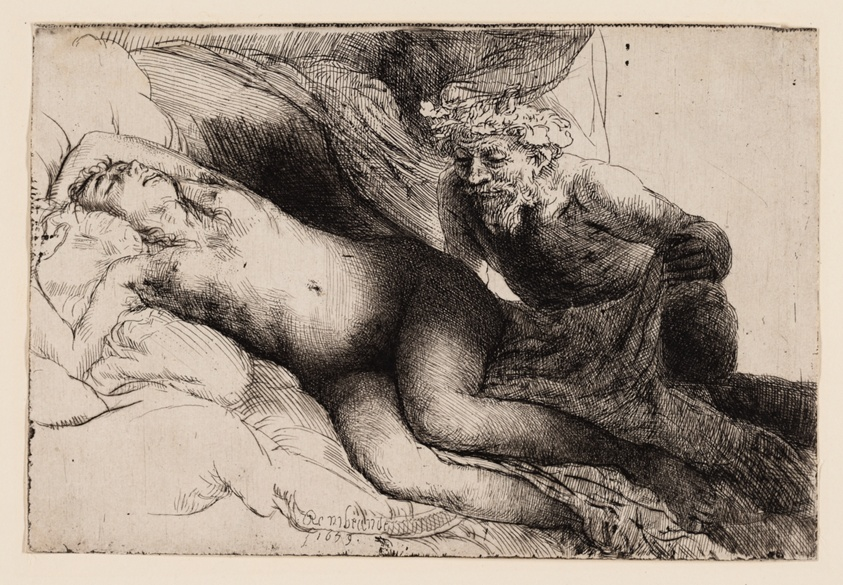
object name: Print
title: Jupiter and Antiope: The Larger Plate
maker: Rembrandt van Rijn (Dutch, 1606-1669)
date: 1659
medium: Etching, drypoint, and burin on off-white laid paper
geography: Holland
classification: etching; print; prints and drawing; paper; drypoint; burin